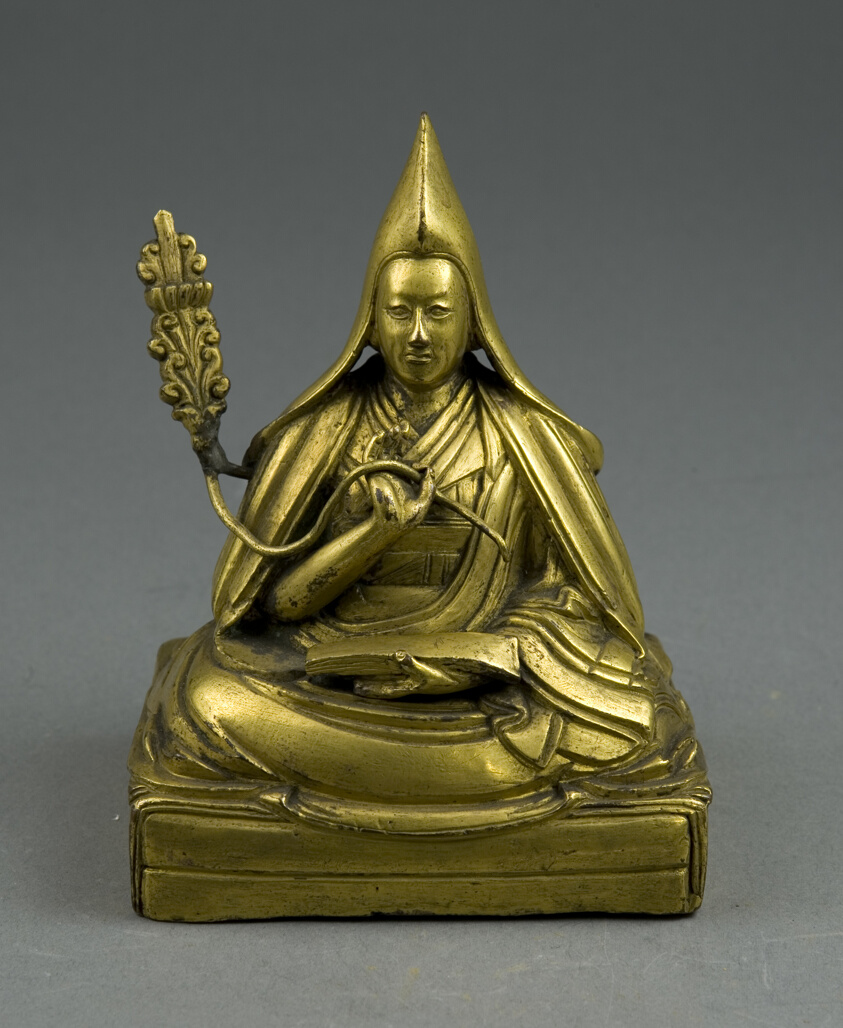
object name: Sculpture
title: Portrait of the Seventh Dalai Lama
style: Himalayan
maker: Tibet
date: 19th century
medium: Gilt bronze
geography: Tibet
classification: bronze; metal; sculpture; asian art